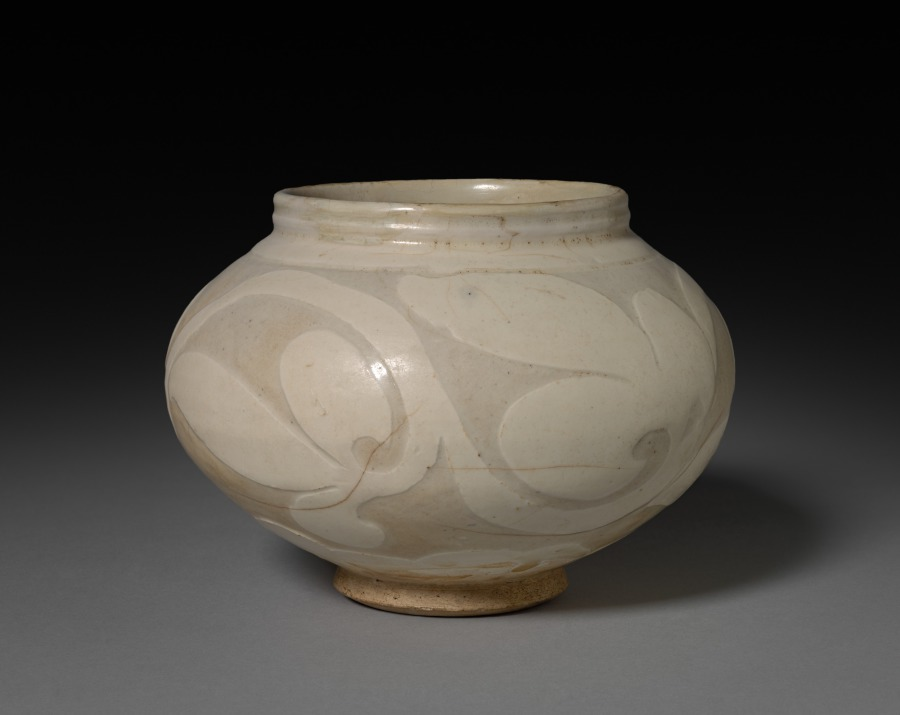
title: Jar: Cizhou ware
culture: China, Northern Song dynasty (960-1127) - Jin dynasty (1115-1234)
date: 12th-13th Century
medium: glazed light gray stoneware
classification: Ceramic